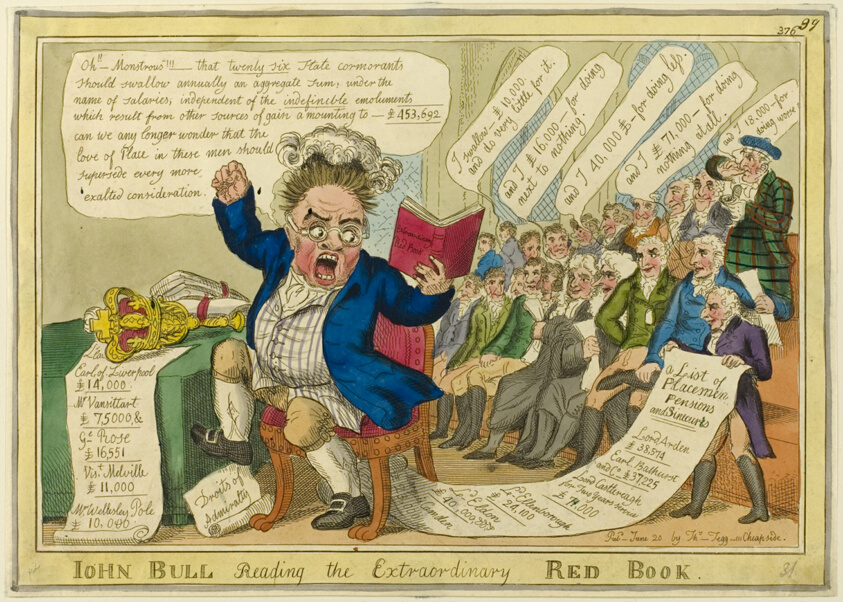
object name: Print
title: John Bull Reading the Extraordinary Red Book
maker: William Elmes (English, active 1804-1816); published by Thomas Tegg (English, 1776-1845)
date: published June 20, 1816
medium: Hand-colored etching on ivory wove paper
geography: England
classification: etching; print; prints and drawing